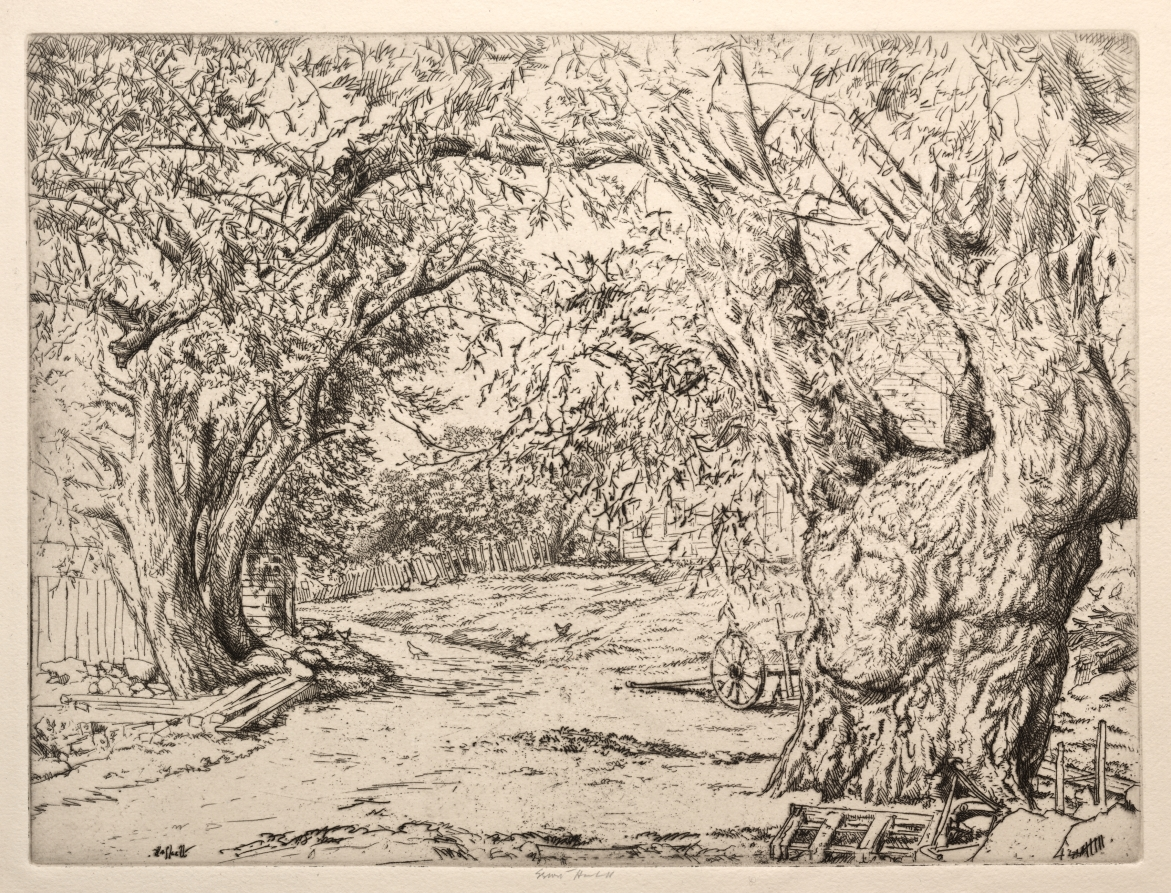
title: Winnegance Willows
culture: America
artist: Ernest Haskell (American, 1876–1925)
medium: etching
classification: Print